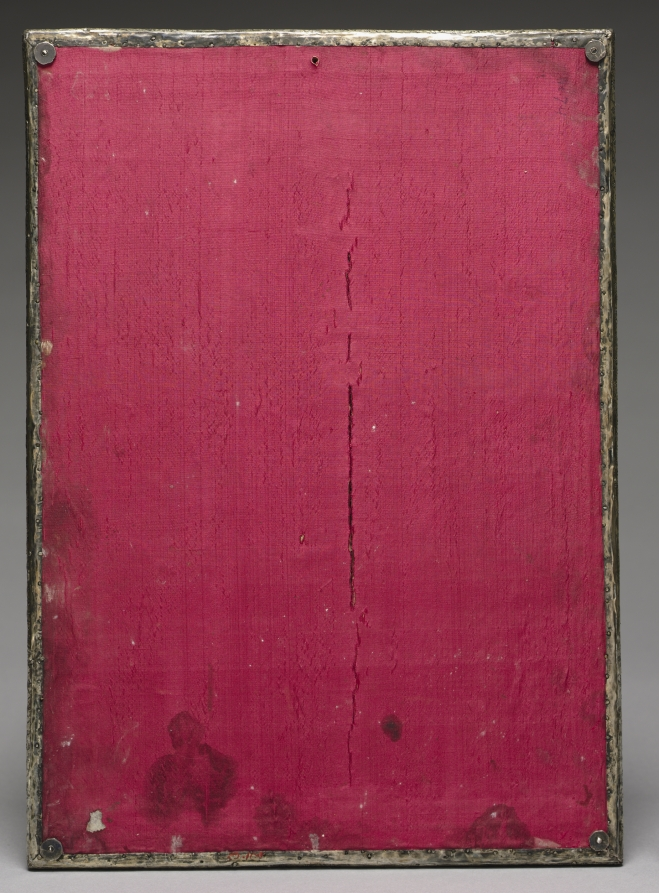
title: Front Cover for a Gospel Book of French Cardinal Jean La Balou (1421-1491)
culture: Italy, Florence, 15th century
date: c. 1467–68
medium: nielloed silver plaques within gilt-silver borders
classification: Metalwork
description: Scenes from Christ’s infancy decorate this cover that once adorned the front of a gospel book. It is made up of a series of silver plaques held together by gilt-silver borders. The plaques are engraved, and the resulting fine lines or depressions have been filled with a silver sulfide alloy, lustrous black in color, in a technique called niello. It is one of the finest examples of this decorative technique for which Florence was renowned in the 15th century. This cover and its manuscript once belonged to the French cardinal, Jean La Balou, who was jailed in 1469. He presented his gospel book to Pope Paul II as a gift, perhaps in the hope of receiving his freedom. The gospel book, of which its two covers have survived (the back cover is in the Minneapolis Institute of Arts), remained in the papal apartments until the end of the 18th century, perhaps leaving when Napoleon’s troops held the Vatican.